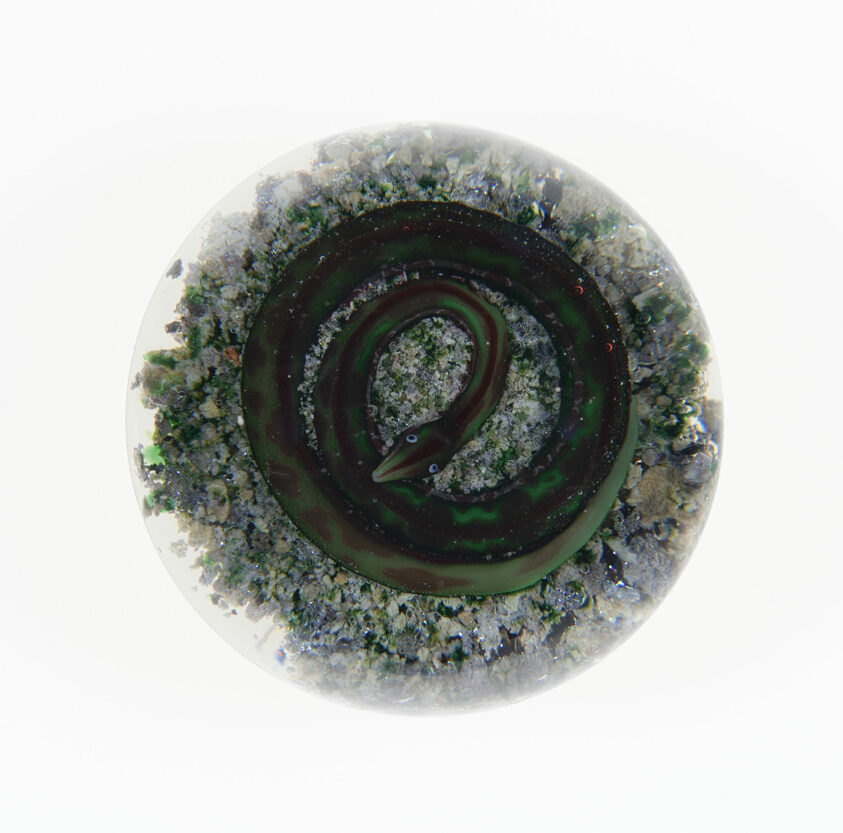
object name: Glass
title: Paperweight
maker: Baccarat Glassworks (Cristalleries de Baccarat); Lorraine, France, founded 1764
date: c. 1845–60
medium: Glass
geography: Baccarat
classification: paperweight; glass